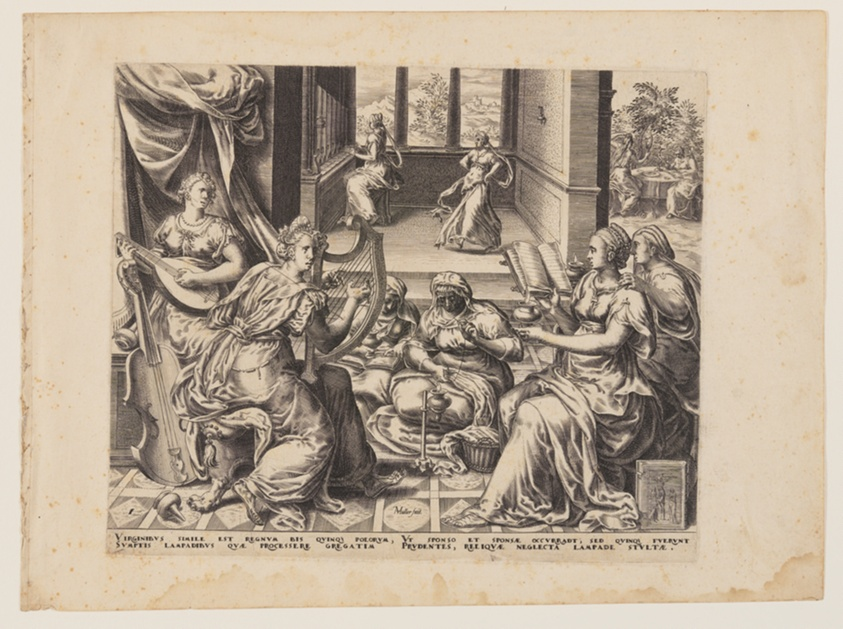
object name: Print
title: Parable of the Wise and Foolish Virgins: The Wise Virgins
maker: Herman Jansz Muller (Netherlandish, c. 1540–1617); after Gerard van Groeningen (Flemish, active c. 1500-1599)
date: c. 1567-70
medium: Engraving on ivory laid papaer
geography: Netherlands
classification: print; paper; prints and drawing; engraving